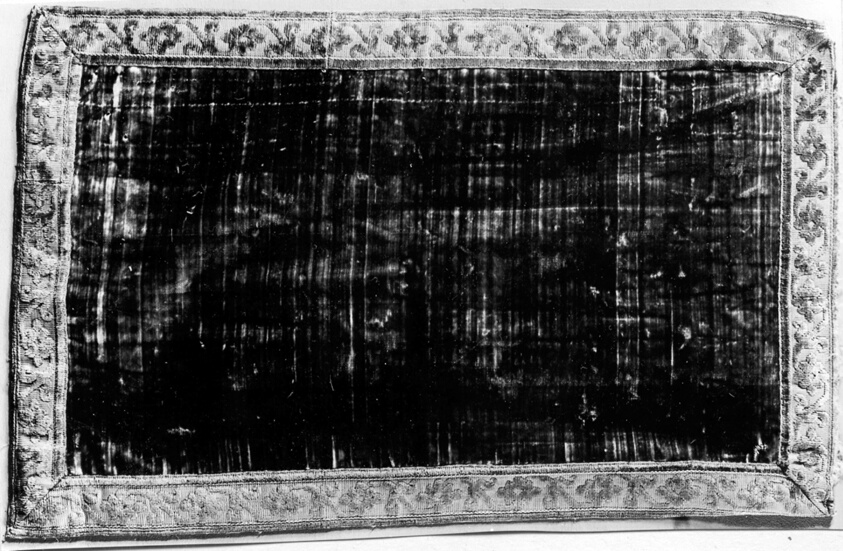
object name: Textile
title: Pillow Cover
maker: Belgium, Antwerp or Italy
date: 16th century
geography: Belgium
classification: textile; weaving - velvet